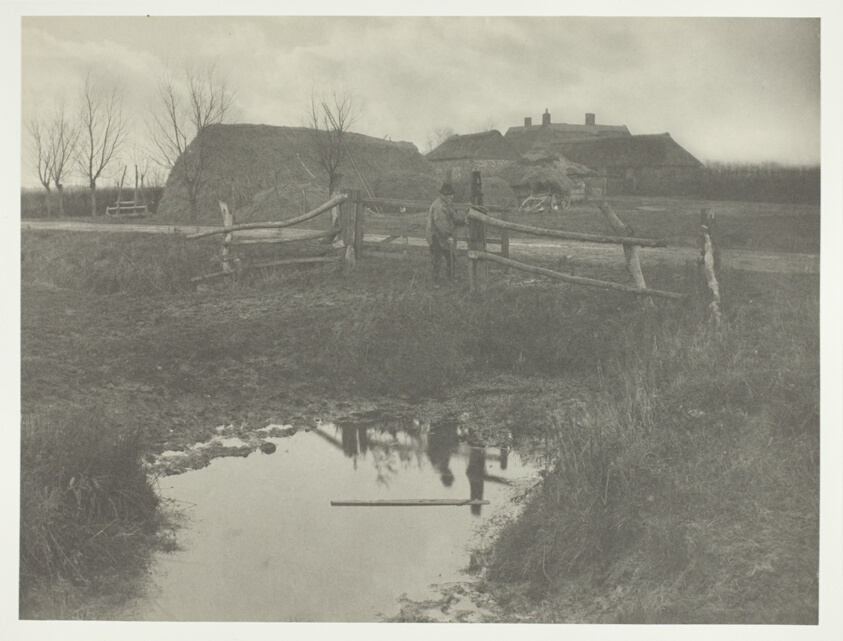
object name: Photograph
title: A Marsh Farm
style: 19th century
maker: Peter Henry Emerson (English, born Cuba, 1856–1936)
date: 1886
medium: Platinum print, pl. XXIX from the album "Life and Landscape on the Norfolk Broads" (1886)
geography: England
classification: platinum print; photographic process; photography; photograph